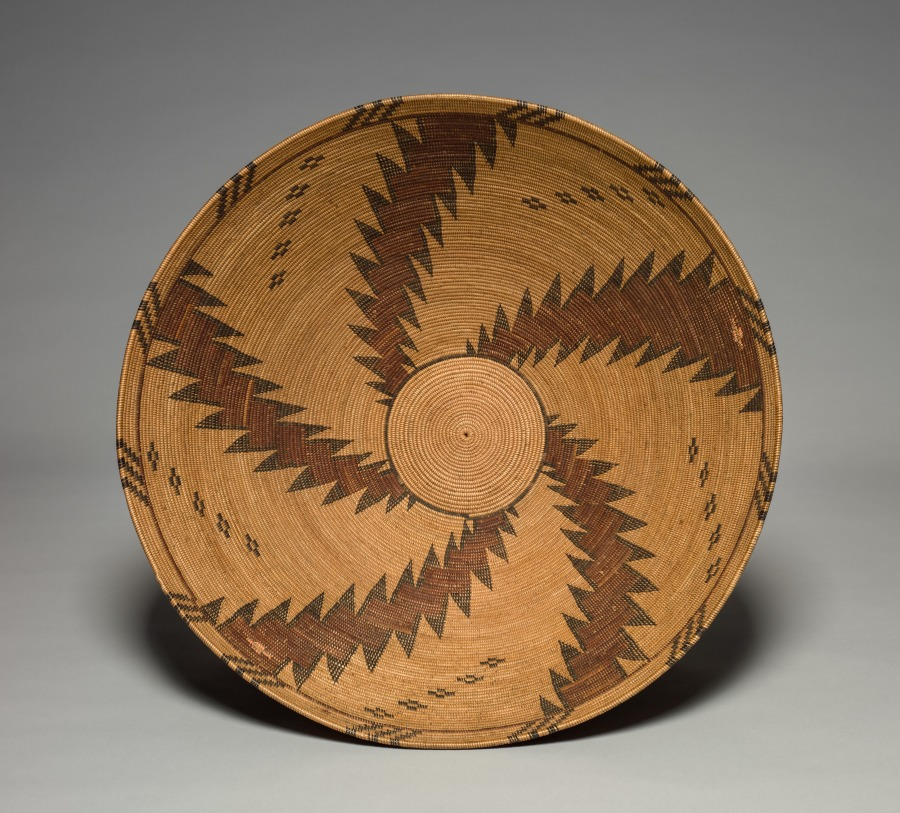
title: Presentation Bowl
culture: Native North America, Great Basin, California, Death Valley, Timbisha (Panamint) Shoshone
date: 1880–90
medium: devil's claw, sumac, yucca root, orange-shafted flicker (woodpecker) quills; coiled (2 rod and bundle of deer grass or basket grass)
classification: Basketry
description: This basket was made for the Euro-American collectors’ market in the early 1900s but it is modeled on basketry bowls from which the Timbisha (Panamint) Shoshone once served food. When used indigenously, the main view would have been of the interior. The two small, pink crosses, made of flicker (woodpecker) quills, may be a maker’s mark. Made-for-sale baskets testify to Indigenous women’s truly creative, resilient responses to forces that endangered their livelihoods and existence.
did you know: The two small, pink crosses on this basket may be a maker’s mark.